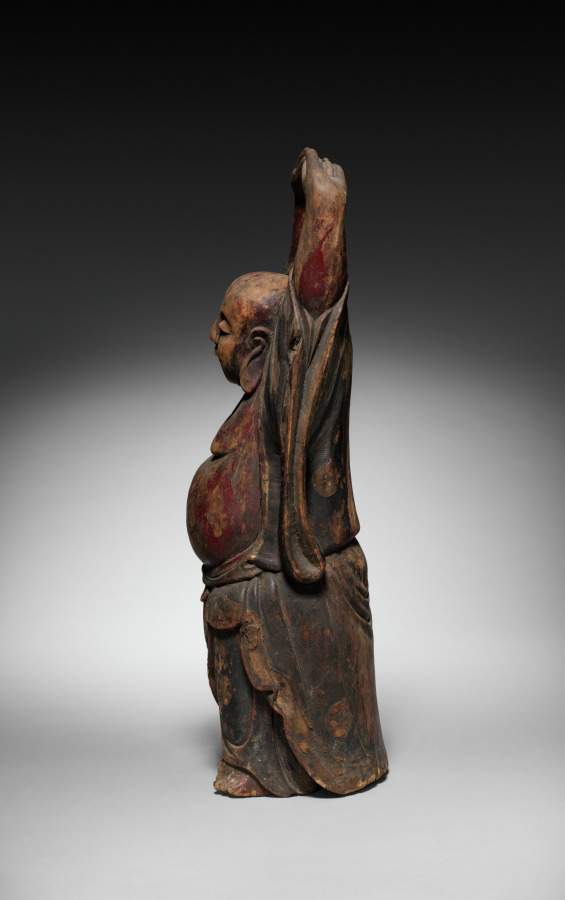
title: The Monk Budai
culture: China, Ming dynasty (1368–1644)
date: 1400s–1500s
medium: wood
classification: Sculpture